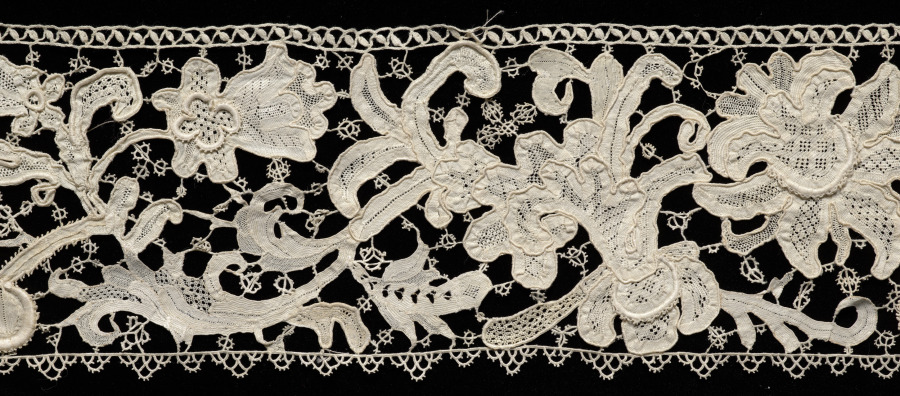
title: Lace Flounce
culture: Italy, Venice, 1600s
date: 1600s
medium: Needle lace (Venetian Raised Point) with Rosaline brides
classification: Lace